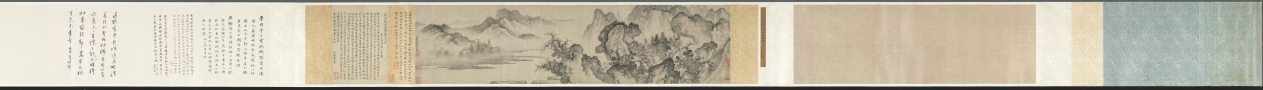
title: Buddha's Conversion of Five Bhiksu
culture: China, Yuan dynasty (1271–1368)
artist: Li Sheng (Chinese, active c. 1324–after 1375)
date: mid-1300s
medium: handscroll; ink on paper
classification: Painting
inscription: 紫篔生李升識 [印] 李氏子雲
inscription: 4 colophons and 12 additional seals: The "Heart" Sutra (Maha Prajnaparamita) text written by Wu Yuqing 吳餘慶 (active early 1400s); 2 seals of Xu Qianxue 徐乾學 (1631–1694); 3 colophons, one dated 1929 and two dated 1936, and 9 seals of Wu Hufan 吳湖帆 (1894–1968); 1 colophon, dated 1932, of Chen Dingshan; 1 seal unidentified.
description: This episode stems from the life of the historical Buddha, who, after his enlightenment, was initially hesitant about preaching his own doctrine. After much personal deliberation and prodding by deities, he finally relented. The first converts were the five guards who served him when he was still a prince. For Li Sheng, this is the pretext of the painting, which moves from the interaction of the bhiksu with the Buddha to a broader awareness of the vast surroundings of the scene.